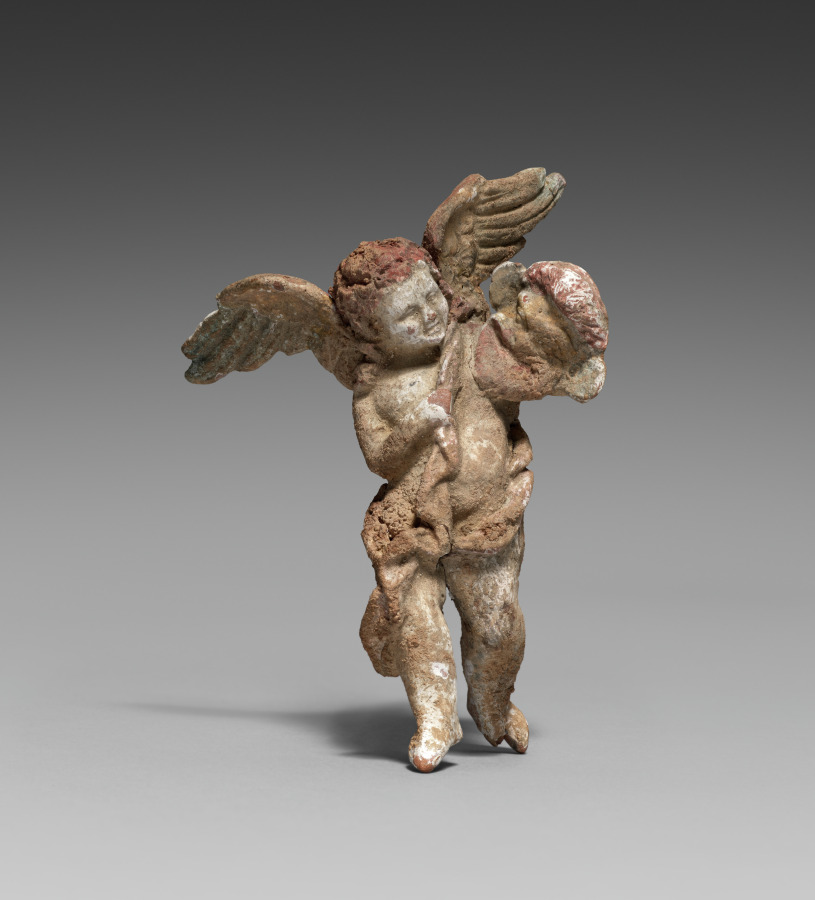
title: Figurine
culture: Greece, Myrina, Hellenistic period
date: 300–100 BCE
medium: terracotta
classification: Sculpture